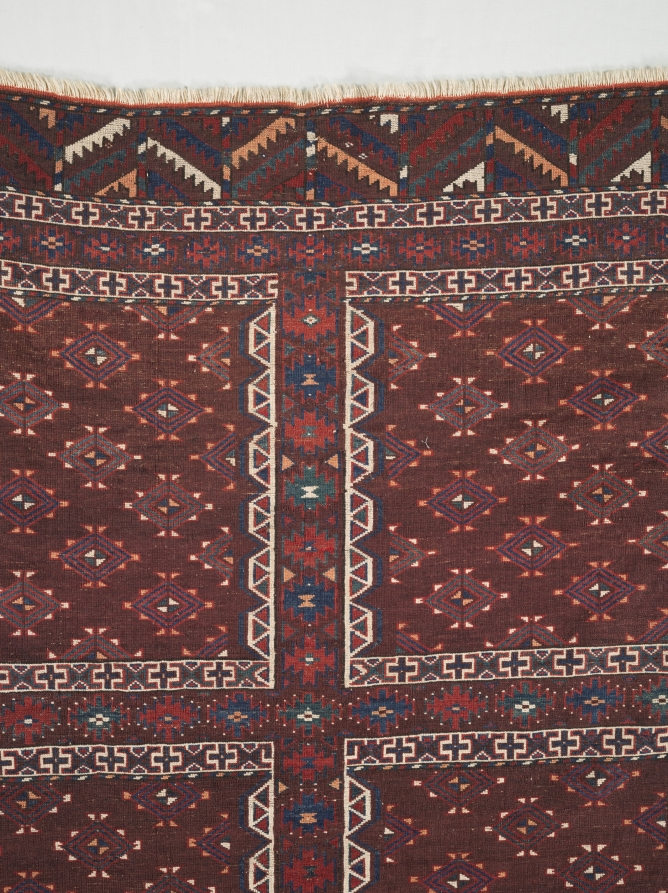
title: Door Rug (Ensi)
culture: Turkmenistan, Yomud, 19th century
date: c. 1900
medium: knotted pile, asymmetrical knot, 117 knots psi; wool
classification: Carpet